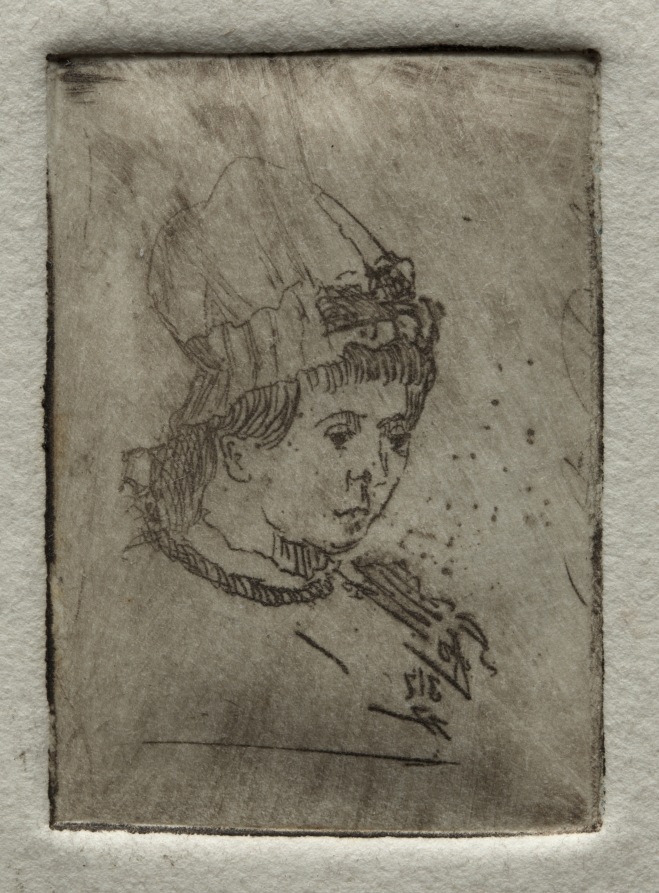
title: Small Head with Mob Cap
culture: America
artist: Otto H. Bacher (American, 1856–1909)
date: 1878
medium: etching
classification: Print